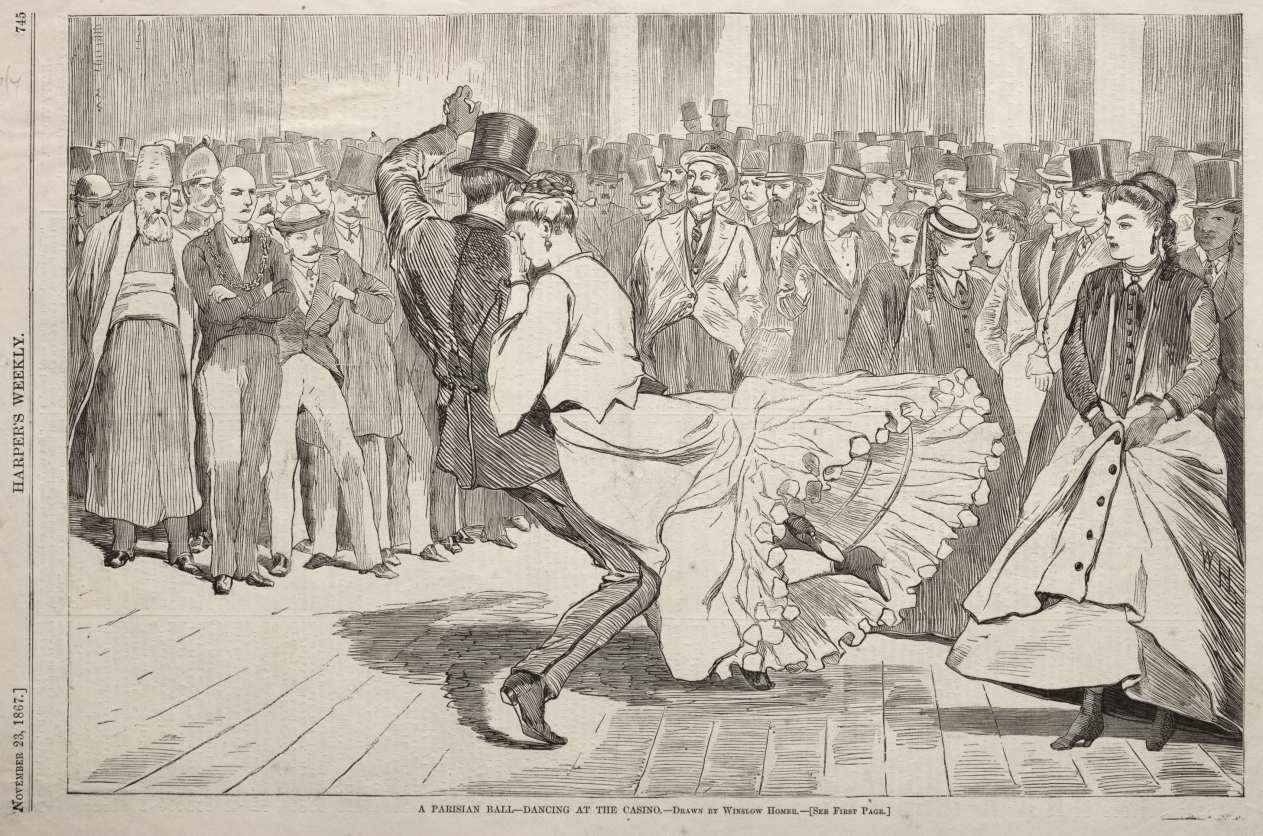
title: A Parisian Ball - Dancing at the Casino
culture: America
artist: Winslow Homer (American, 1836–1910)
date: 1867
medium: wood engraving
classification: Print